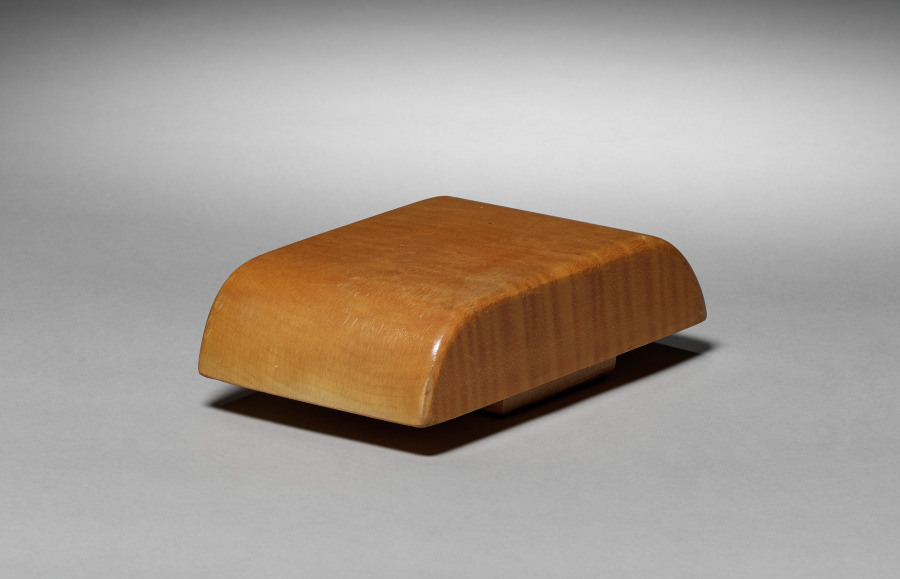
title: Streamline Automobile: Removable Convertible Top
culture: Denmark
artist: Boysen Toys (Danish)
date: 1900s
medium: wood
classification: Wood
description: Credit line: John D. Rockefeller General Education Board Grant II